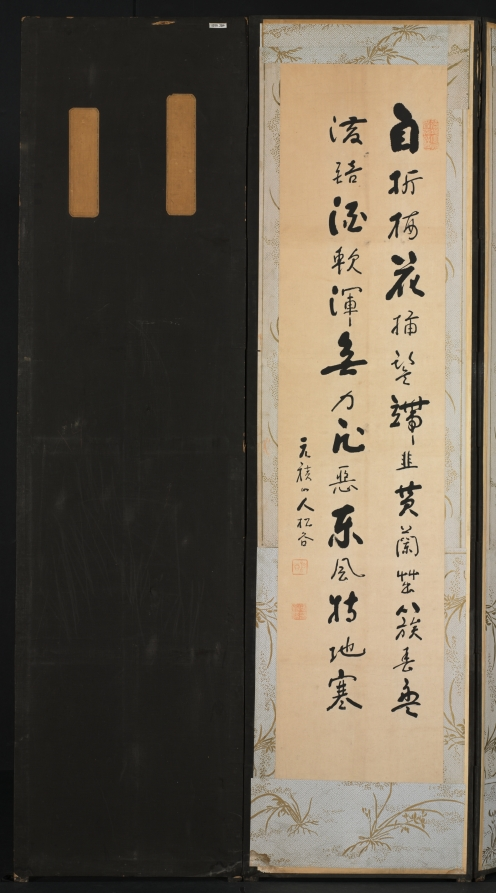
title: Painting of One Hundred Themes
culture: Korea, Joseon dynasty (1392–1910)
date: late 1800s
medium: Ten-panel folding screen affixed with album leaves (obverse), calligraphy (reverse), ink and color on silk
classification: Painting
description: The front of this screen features an assortment of subjects: birds and flowers, landscapes, and scenes of everyday life, mostly in monochromatic ink with light colors. The screen’s reverse side conveys a number of classical poems about the fleeting beauty of the four seasons. Traditionally, only one side of a folding screen bears painted or embroidered images, since these were used as a background furnishing. In Korean houses by the 1800s and early 1900s, however, two-sided folding screens became noticeably popular, possibly inspired by Japanese double-sided folding screens, which mainly served as room dividers in Japanese households.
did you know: The way of displaying small images of various subjects became one of the most popular type of painting toward the end of the 19th century.